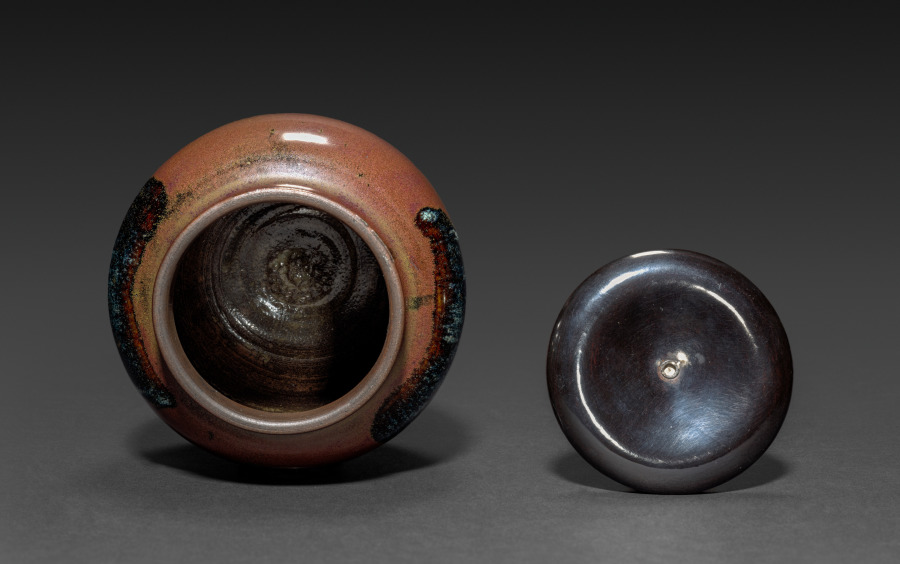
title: Jar with Wooden Cover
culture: Japan, Edo period (1615–1868)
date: 1700s-1800s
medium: pottery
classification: Ceramic